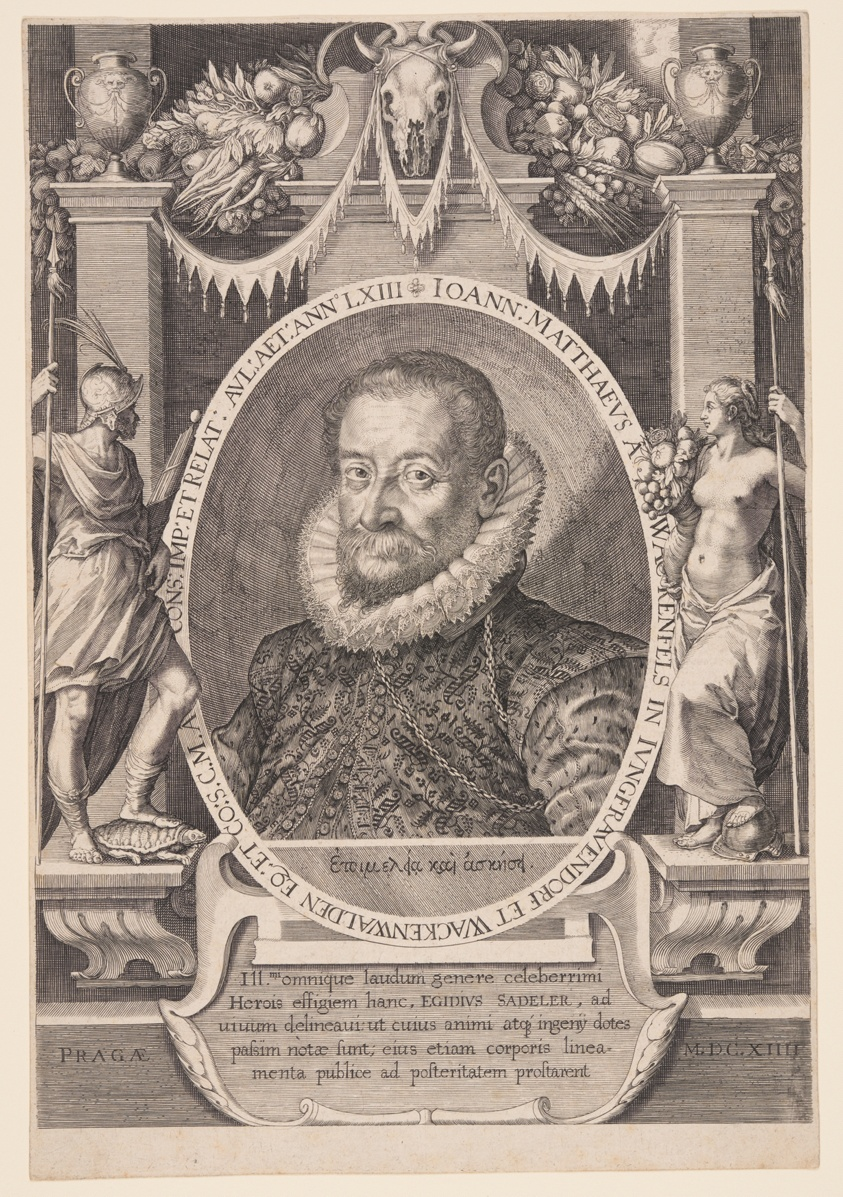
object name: Print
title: Johannes Matthaeus Wacker von Wackenfels, Diplomat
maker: Aegidius Sadeler II; Flemish, c. 1570–1629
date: 1614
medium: Engraving on paper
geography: Flanders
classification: engraving; paper; print; prints and drawing